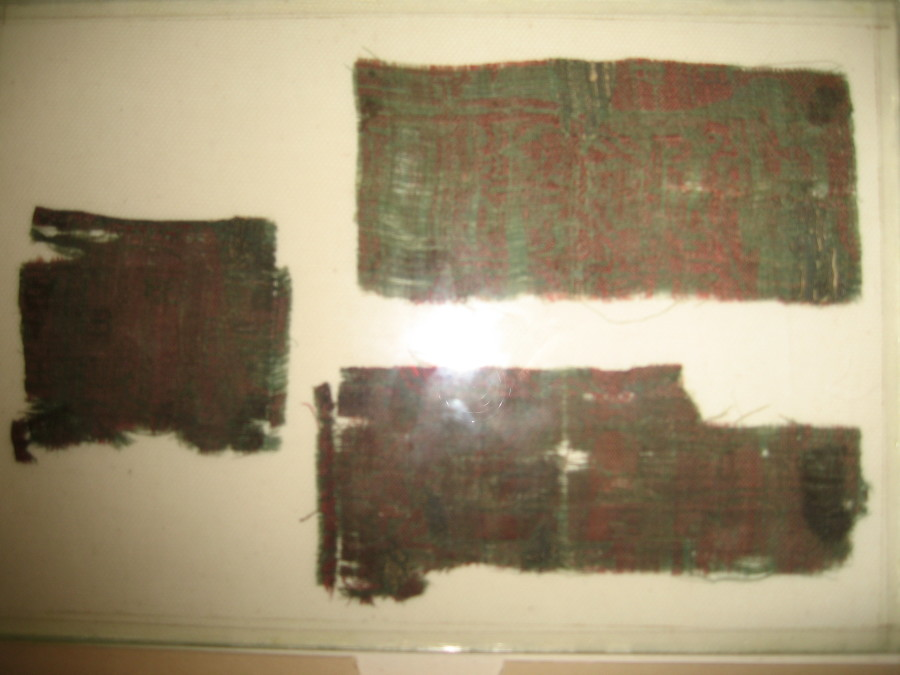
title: Three Fragments of Italian Gothic Silk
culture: Italy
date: 1300s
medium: lampas weave, brocaded; silk and gold thread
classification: Textile